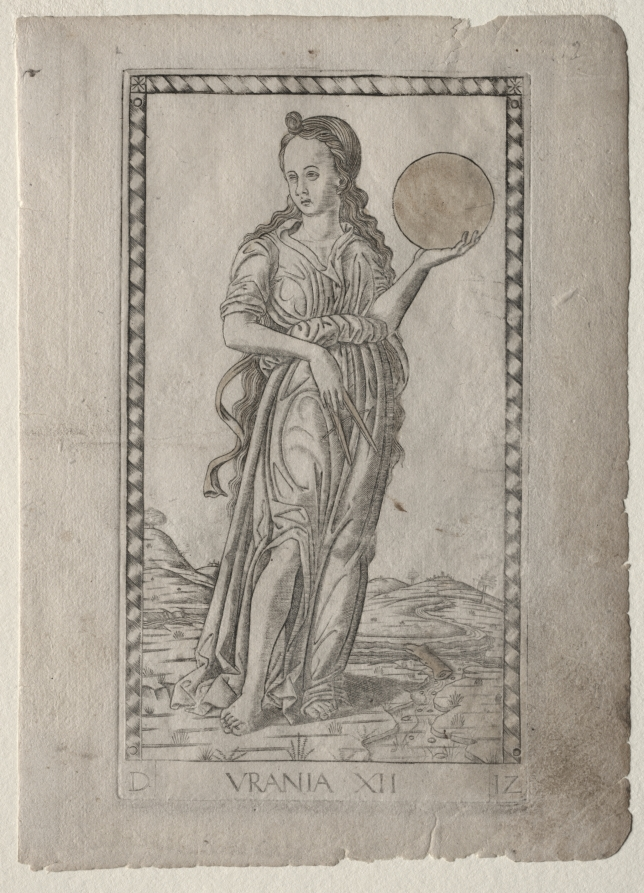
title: Urania (astronomy) (from the Tarocchi series D: Apollo and the Muses, #12)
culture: Italy, Ferrara, 15th century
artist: Master of the E-Series Tarocchi (Italian, active 1460s)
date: before 1467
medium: engraving hand-colored with gold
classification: Print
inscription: Lettered below the image of Urania (Muse of Astronomy): ·D· / ·URANIA·XII· / ·12·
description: This engraving is part of the Tarocchi group marked with the letter “D,” and named Apollo and the Muses. In Greek mythology, the nine Muses (Calliope, Urania, Terpsichore, Erato, Polyhymnia, Thalia, Melpomene, Euterpe, and Clio) were the daughters of Zeus, king of the gods, and Mnemosyne, the Titaness of memory. The Muses were goddesses presiding over different branches of the arts and sciences. Their leader and supervisor was Apollo, the god of light, music, prophecy, and poetry. Here, Urania is personified as a full-length female figure, set in an imaginary hilly landscape. She carries a celestial globe in her left hand, and a compass in her right hand, symbolizing that she is the Muse of Astronomy.